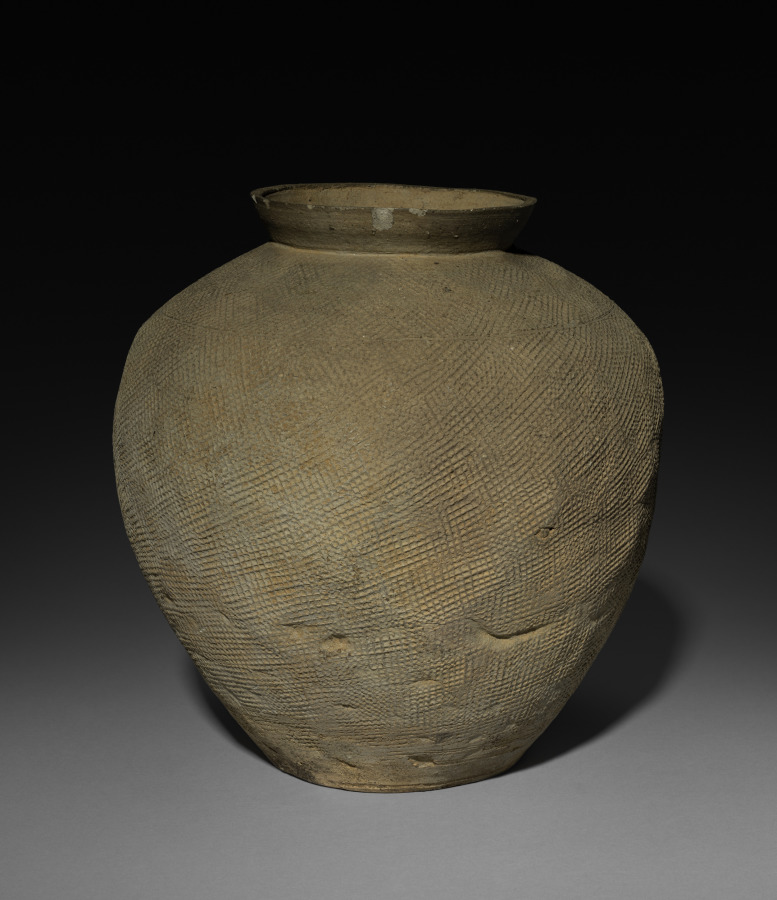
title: Jar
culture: China, Hunan province, reportedly Changsha, Eastern Zhou dynasty (770–256 BCE), Warring States period (475–221 BCE)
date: 481–221 BCE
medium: earthenware with stamped decoration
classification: Ceramic